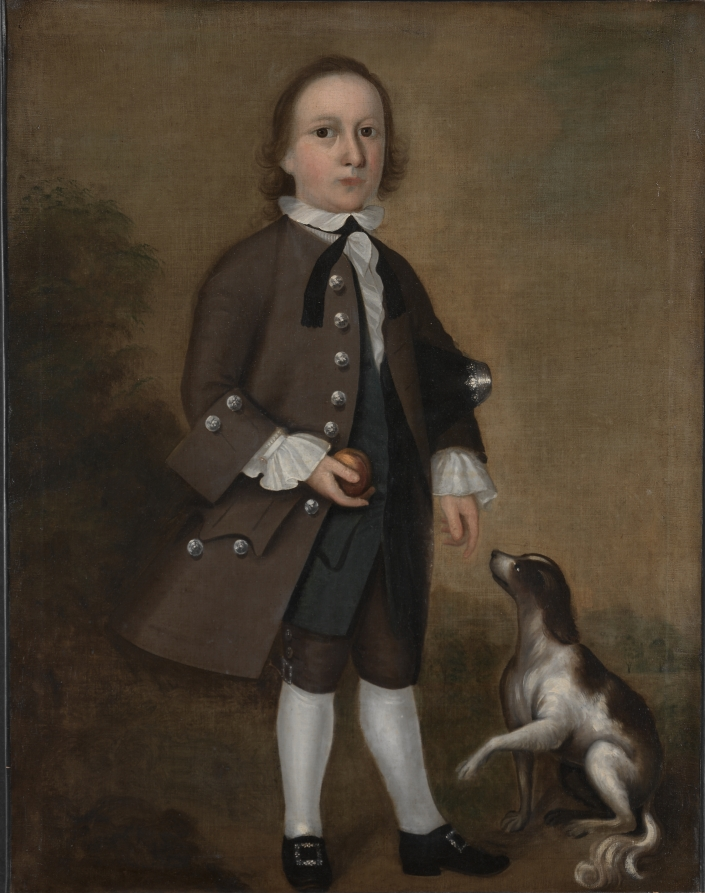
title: Jeremiah Belknap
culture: America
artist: Joseph Badger (American, 1708–1765)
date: c. 1758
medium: oil on canvas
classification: Painting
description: Lacking formal training, Badger got his start painting houses and signs in Boston, then shifted his focus to accommodate the increasing market for portraits in the colonies. Jeremiah Belknap is shown here at about 7 years old, but his attire gives him the appearance of a miniature adult. The artist’s portraits of children often include fruit and animals—the ripening peach in Belknap’s right hand suggests maturation, while the dog at his feet symbolizes loyalty.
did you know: Badger was also a glazier, a tradesman who fits glass into doors and windows.